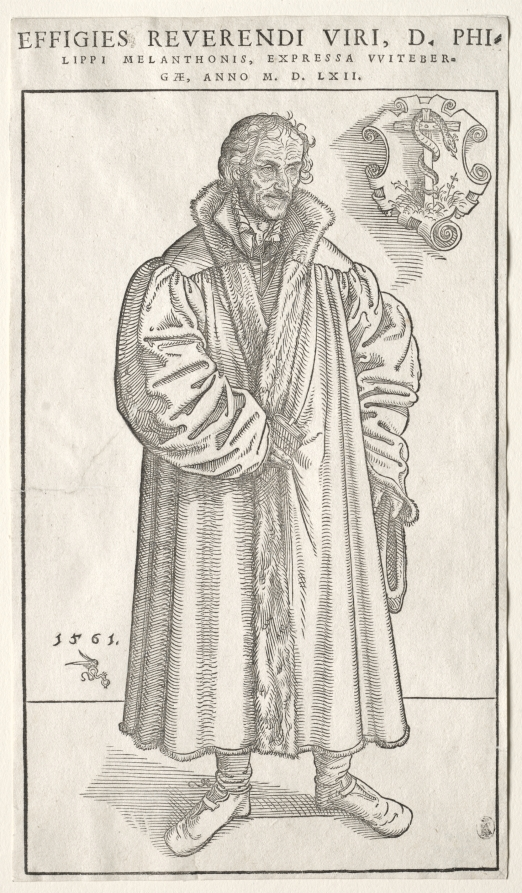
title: Philipp Melanchthon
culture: Germany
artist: Lucas Cranach (German, 1515–1586)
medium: woodcut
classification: Print